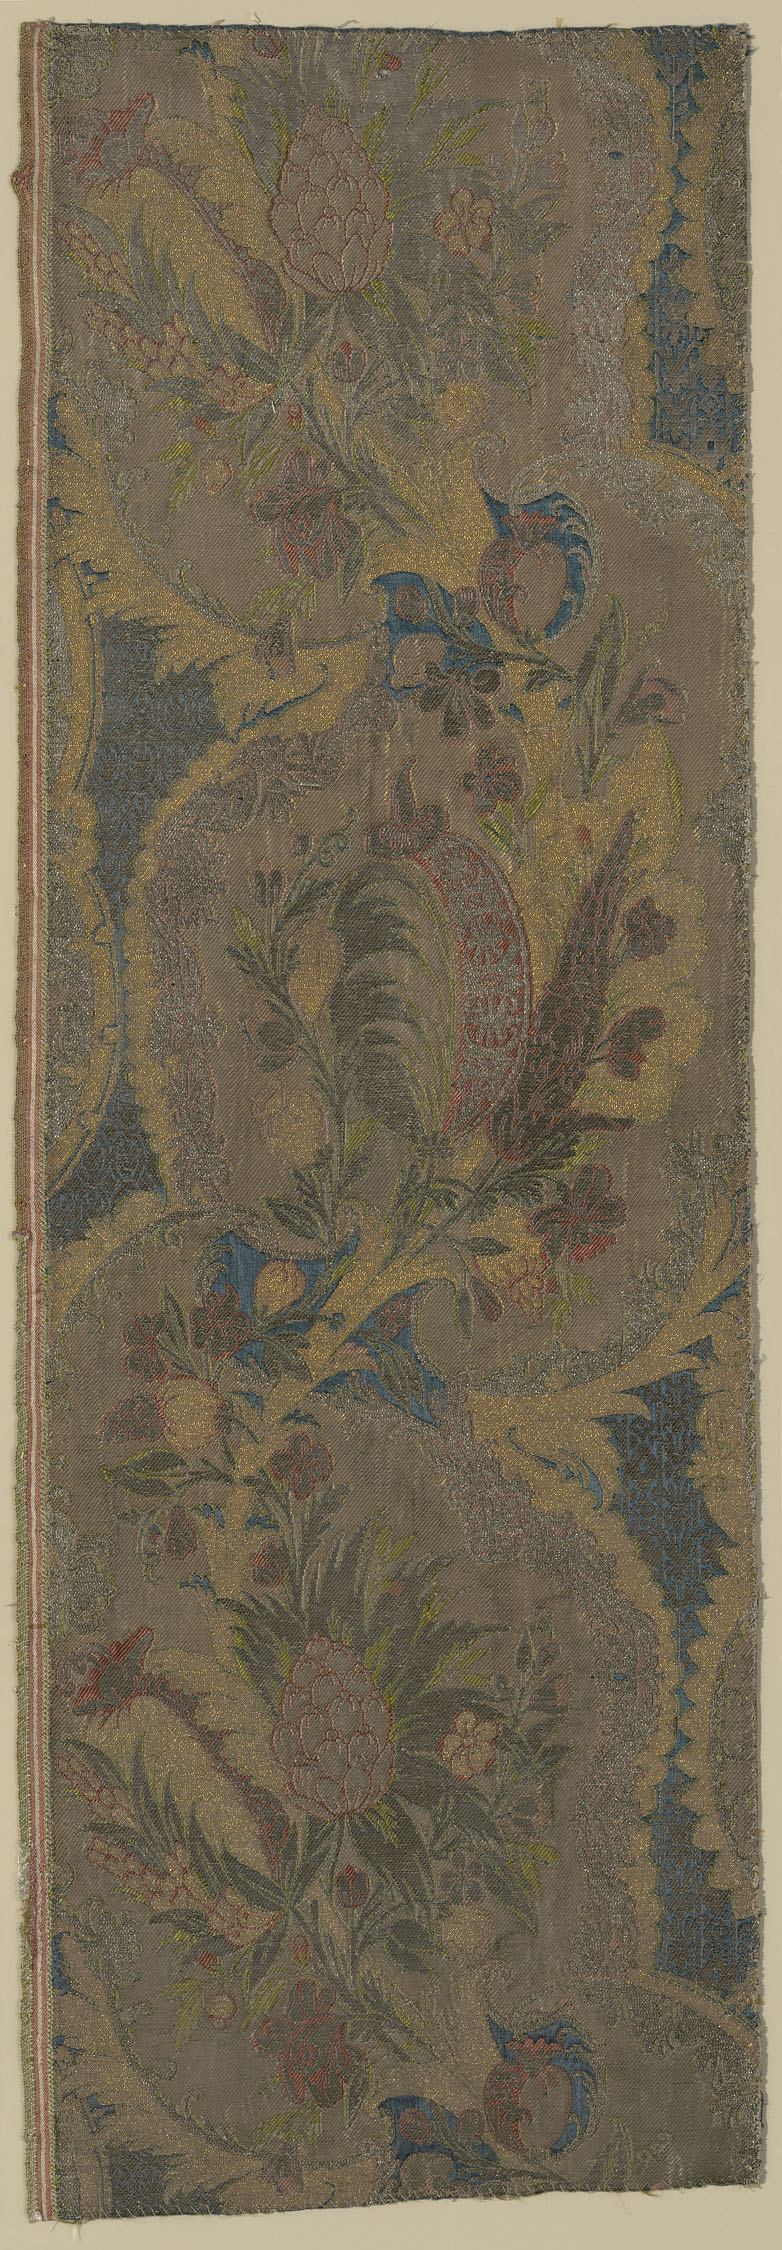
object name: Textile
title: Fragment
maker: France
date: c. 1712/15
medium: Silk and gilt- and silvered-metal-strip-wrapped silk, warp-float faced 4:1 satin weave with secondary binding warps tying supplementary brocading wefts and two-color complementary ground wefts in twill interlacings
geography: France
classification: textile; weaving